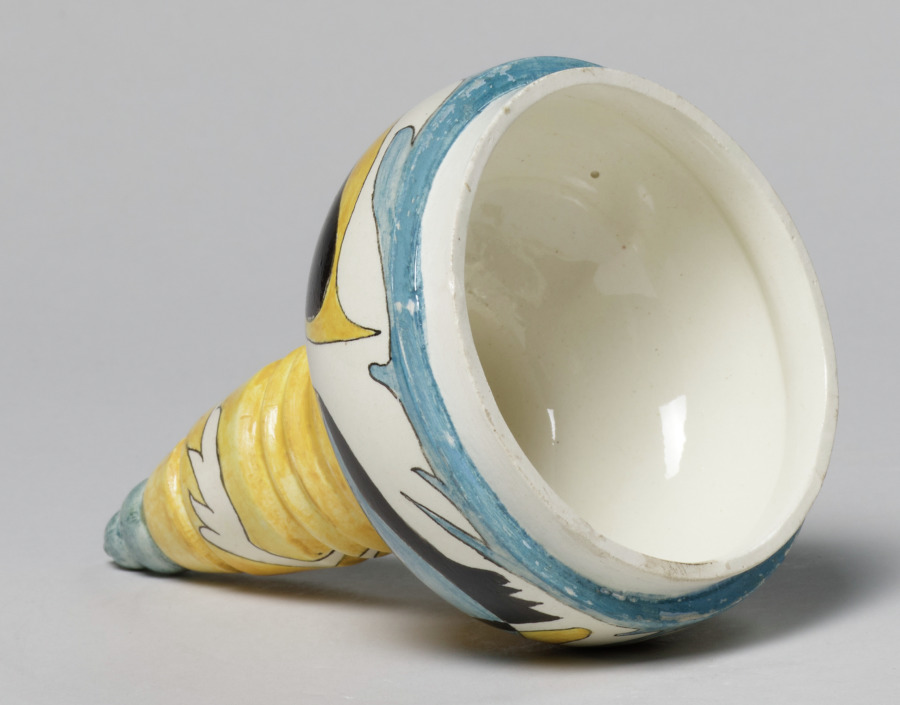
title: Lid for a Jar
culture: Netherlands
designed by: Theodorus A. C. Colenbrander (Dutch, 1841–1930)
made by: Rozenburg Factory (Netherlandish)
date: 1885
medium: earthenware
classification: Ceramic